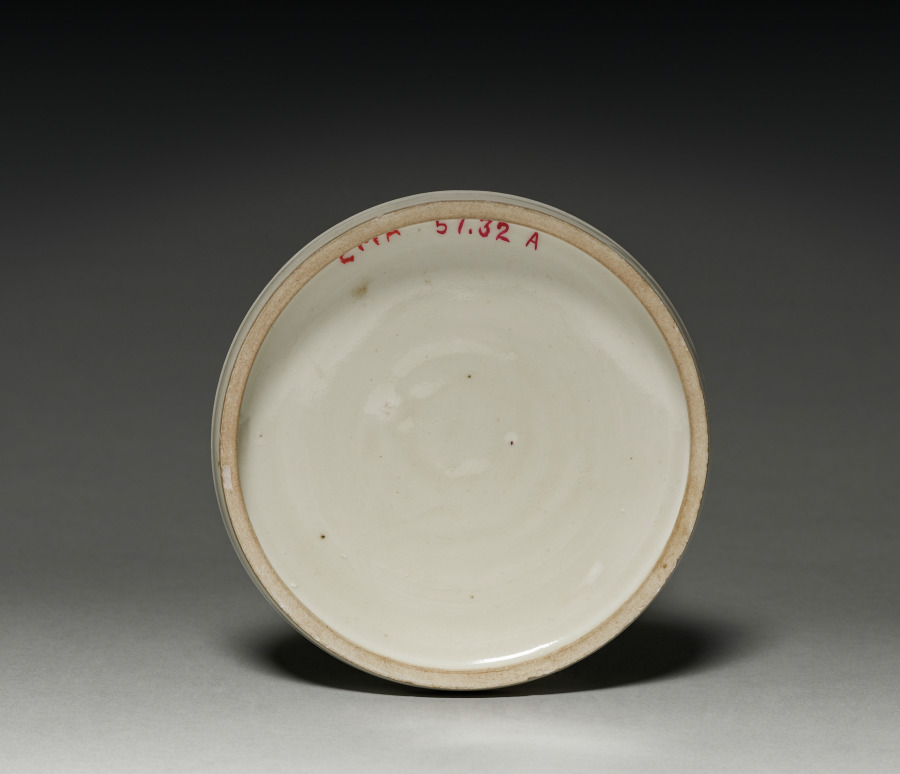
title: Covered Box (lid)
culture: China, Hebei province, Quyang, Northern Song dynasty (960-1127) to Jin dynasty (1115-1234)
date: 1100s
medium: cream-glazed porcelain with incised decoration, Ding ware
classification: Ceramic